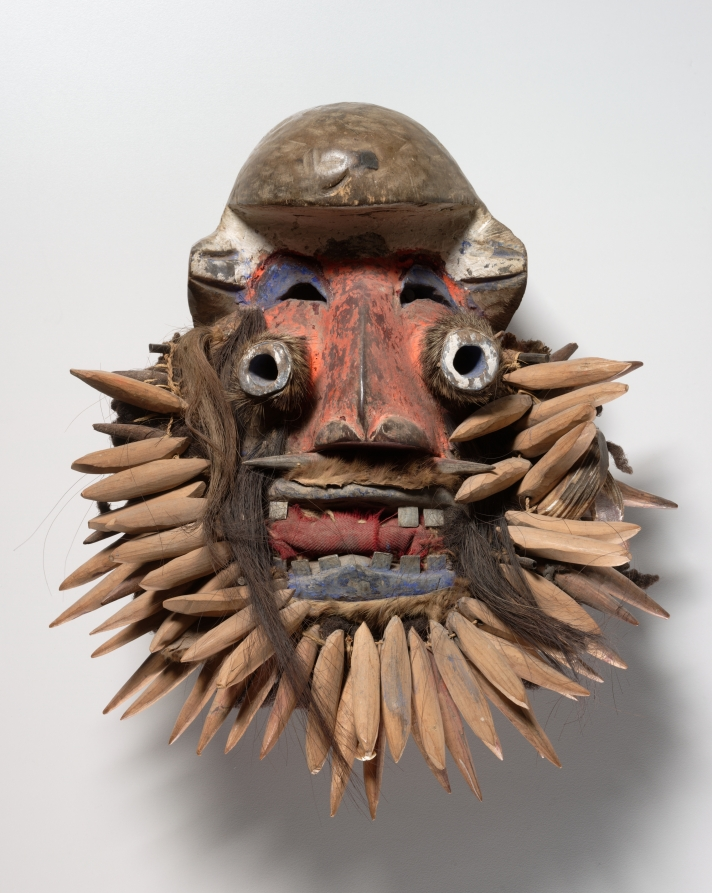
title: Face Mask (Tehe gla)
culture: Africa, West Africa, Côte d'Ivoire or Liberia, Wè-style carver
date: early 1900s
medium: Wood, boar tusks, pelt, cloth, human hair, probably aluminum, reeds, iron alloy, copper alloy, plant fiber, and paint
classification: Mask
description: Tubular eyes and the fringe of carved leopard canine teeth identify this mask as male. Such masks appeared only during very important moments. The dancer wore a leopard skin over his head and shoulders, held an elephant's tusk in his hand, and had his face painted white. The masks function as peacemakers; they led soldiers into battle, and administered justice.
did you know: The masquerader who wore this mask also had a body costume of layers of raffia and matching anklets; cloth covered their head.